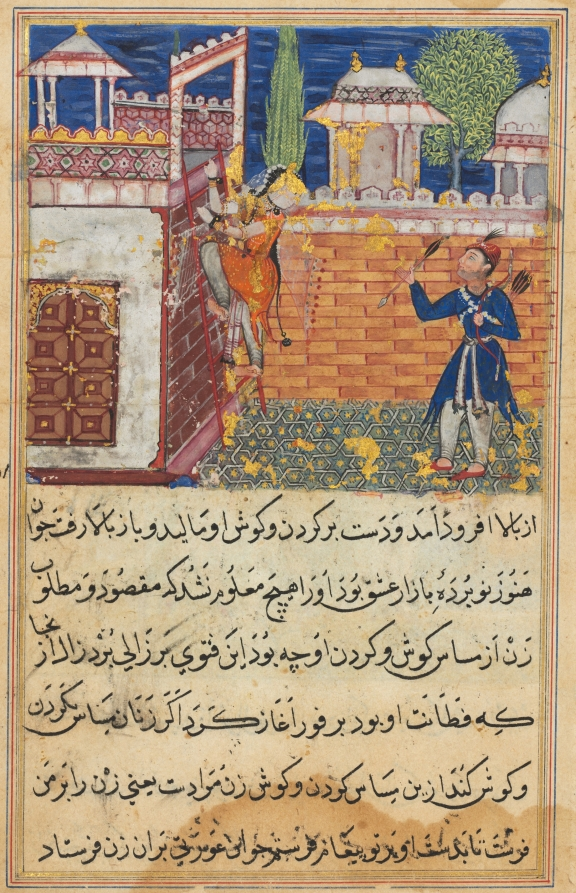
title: The deceitful wife returns to her terrace after caressing her lover, from a Tuti-nama (Tales of a Parrot): Eighth Night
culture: Mughal India, court of Akbar (reigned 1556–1605)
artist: Shravana (Indian, active 1550s–c.1600)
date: c. 1560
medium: gum tempera, ink, and gold on paper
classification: Painting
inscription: srawan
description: In order to convince the king that he should not have the prince executed solely on the basis of the handmaiden's accusation, the king's seven viziers each tell a story about the actions of a deceitful woman. This painting depicts the opening scene of the story told by the fifth of seven viziers. An adulterous wife has surreptitiously climbed down from her room to caress a man on the street, whom she wants to take as a lover. In the margin of the painting on this page is an inscription written in Persian identifying the name of the artist Shravana.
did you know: Bright gold is visible in areas where the paint has flaked away.